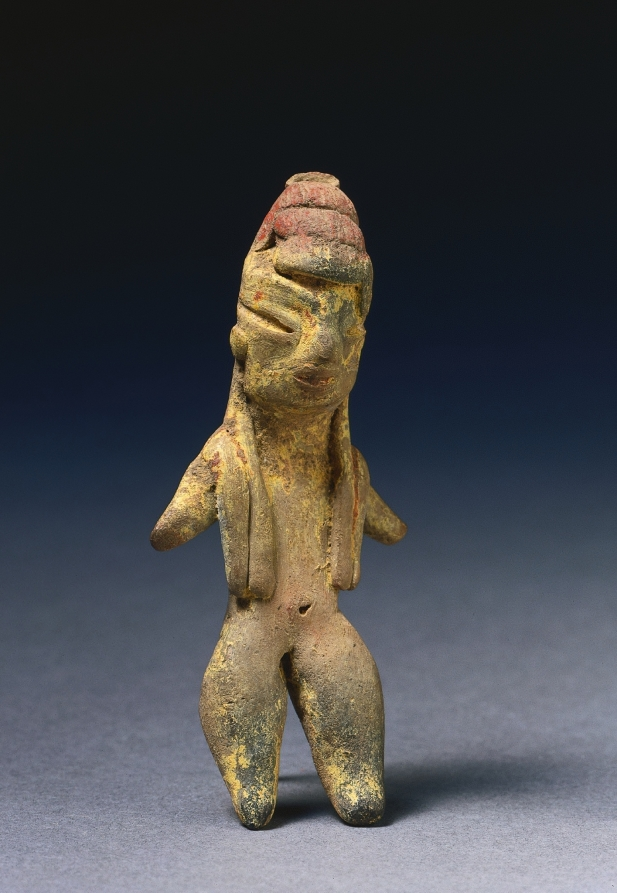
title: Archaic Figurine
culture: Mesoamerica, Central Mexico, Tlatilco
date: c. 1200–900 BCE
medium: earthenware with pigment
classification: Ceramic